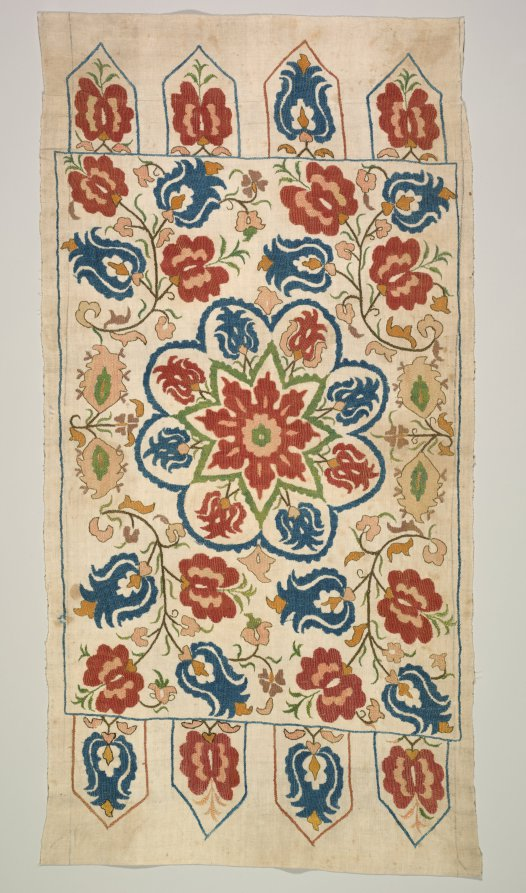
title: Embroidered cushion cover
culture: Turkey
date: 1700s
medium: plain weave: linen; embroidery, self-couching and herringbone stitches: silk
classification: Embroidery